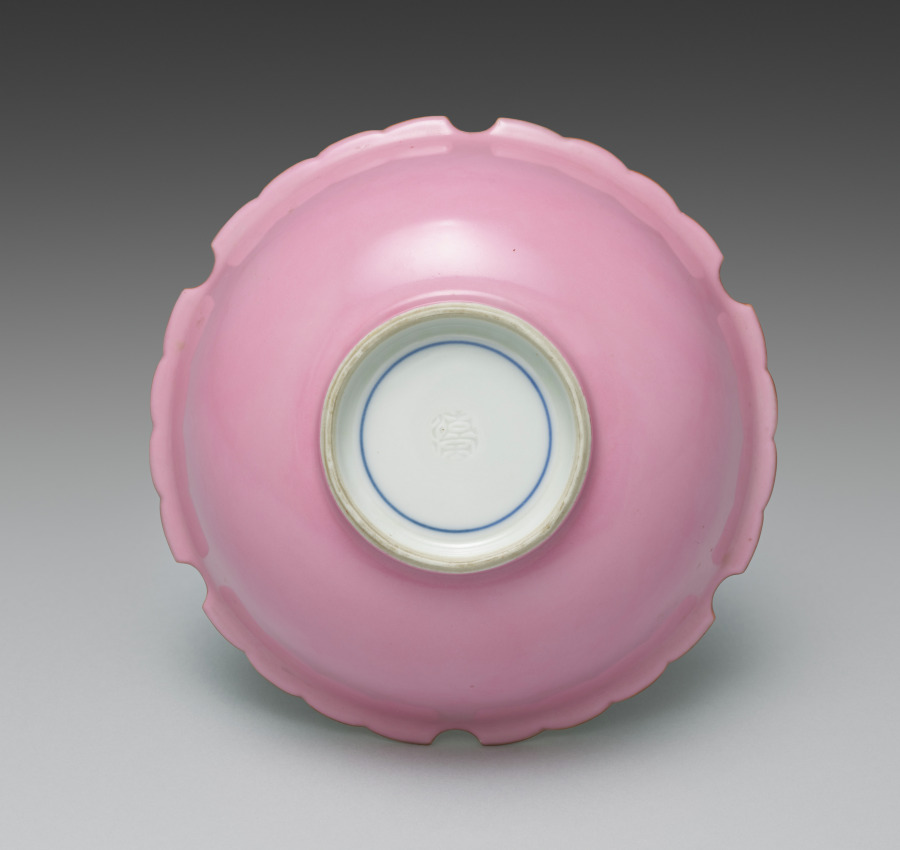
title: Dish from Snow-Flake Side Dishes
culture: Japan, Meiji period (1868–1912)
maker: Seifū Yohei III (Japanese, 1851–1914)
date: 1893–1914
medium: One from a set of six porcelain dishes; porcelain with lobed rims and pink glaze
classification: Ceramic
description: According to the box lid, this set of six side dishes, or mukōzuke, are “snow-flower style” (sekkashiki), having mouths shaped like snowflakes. Their mouths, which have six lobes and scalloped edges, are traced with brown iron oxide at the rim. The outside of each bowl is glazed with a very bright pink over the basin and foot, and the inside is left white. From directly above, one sees a snowflake-like shape, and from the side, they seem to float above a rosy ground.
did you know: The box for this set of dishes has an inscription on the side noting that they were for a person with the family name Nakamoto.